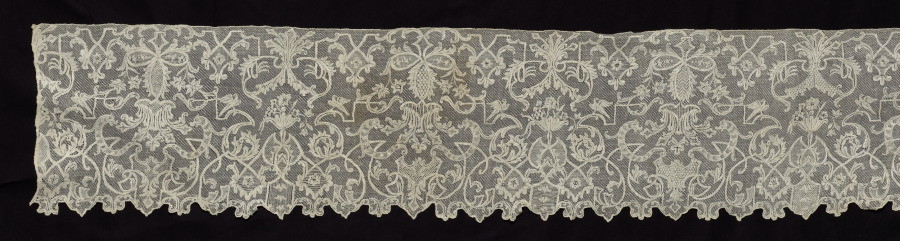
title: Lace Flounce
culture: England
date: 1680s–1790s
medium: Linen: needle lace (drawnwork) and embroidery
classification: Lace